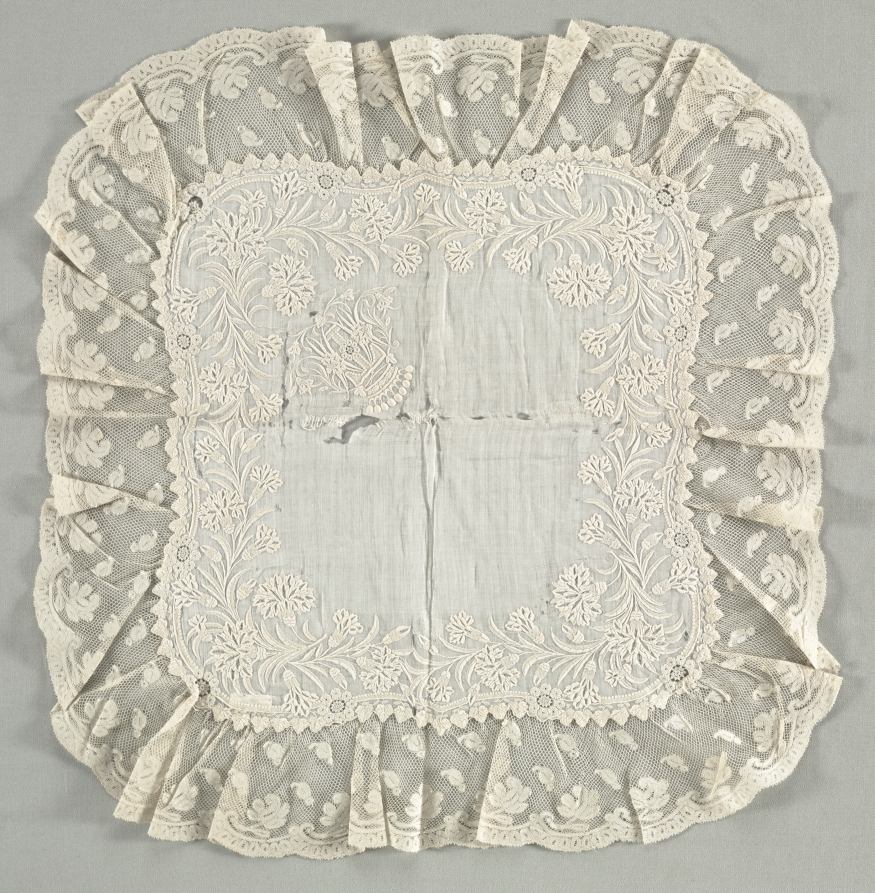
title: Lace Handkerchief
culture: France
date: late 1800s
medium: Plain weave cotton center; bobbin lace border and embroidery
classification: Embroidery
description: An initial T and a coronet are embroidered in white in one corner of this handkerchief.